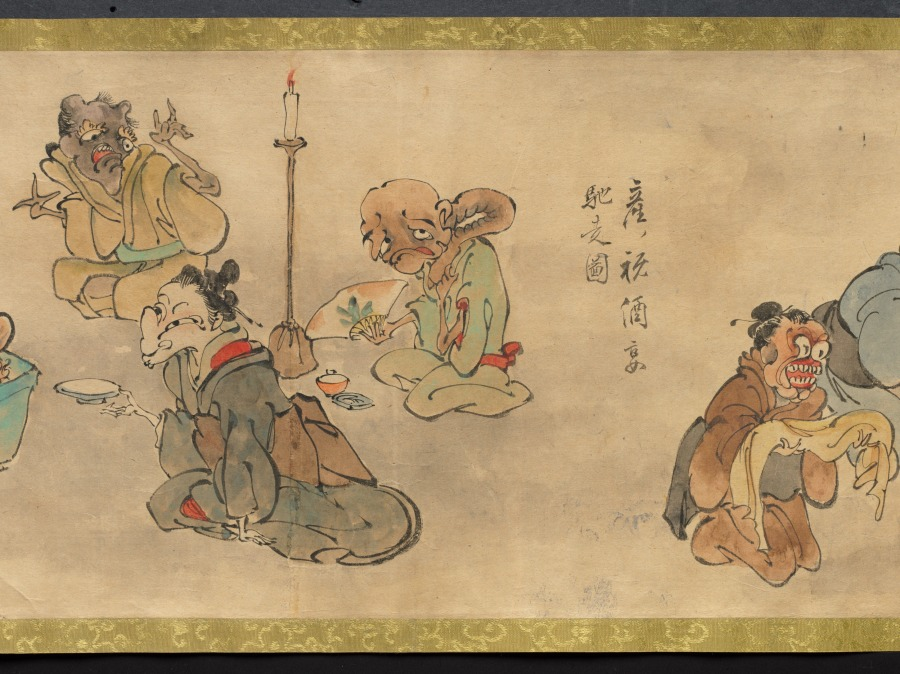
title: An Illustrated Marriage of Apparitions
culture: Japan, Edo period (1615–1868)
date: mid-1800s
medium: handscroll; ink and color on paper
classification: Painting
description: The matchmaking, engagement, wedding, and birth of the first child of two apparitions, or bakemono, literally "things that change," are illustrated in this whimsical, humorous handscroll. Japanese folklore abounds with such strange creatures, most famously represented in handscrolls featuring a procession of 100 supernatural monsters. Aside from a textual preface and cartouches indicating the content of the scenes, the tale is told visually. The artist and whereabouts of the original handscroll are unknown, but a number of other 19th-century copies by amateur painters exist in Japanese collections, attesting to its broad appeal.